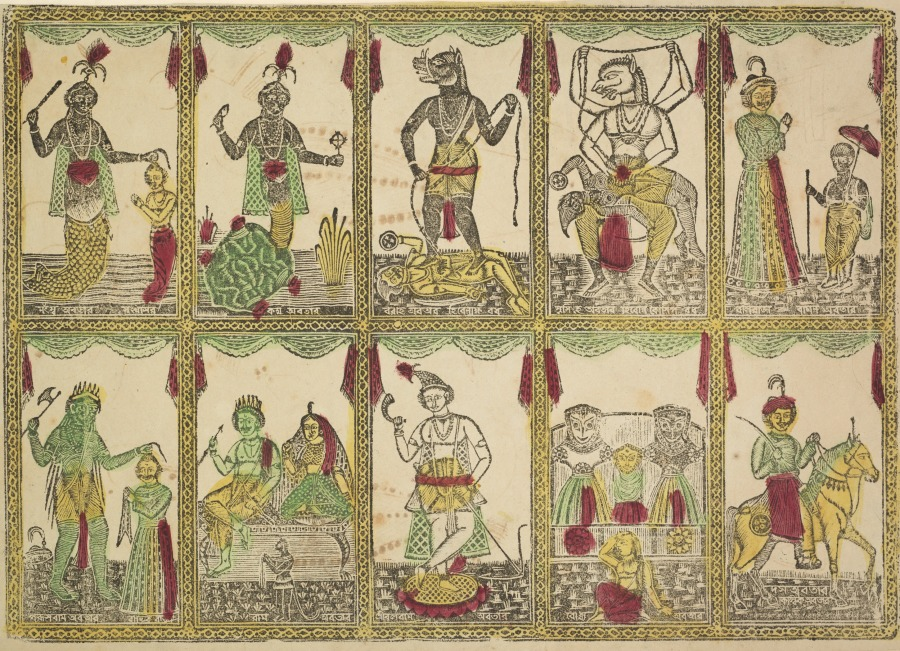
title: Das Avataras, Ten Incarnations of Vishnu (verso), from a Kalighat album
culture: Eastern India, Bengal, Kolkata, Kalighat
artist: Shri Gobinda Chandra Roy (Indian, active late 1800s)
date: c. 1890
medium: Woodcut, hand colored with gum tempera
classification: Painting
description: This hastily hand-colored woodcut depicts a set of ten avatars, or incarnations, of the Hindu god Vishnu as recognized in 1800s Bengal. In each avatar, Vishnu descended to earth in order restore balance and order to the world. In the top register, from left to right, are Vishnu’s avatars as fish, tortoise, boar, man-lion, and Brahmin. Below are Parashurama, Rama, Krishna, Jagannath, and Kalki. The image of Rama shows him after his victory over the demon Ravana. He sits with Sita, crowned, holding bow and arrow. His monkey general Hanuman stands before him in a gesture of adoration.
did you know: The hero Rama is can be seen in the lower register, second from left, with his wife Sita and devotee Hanuman.